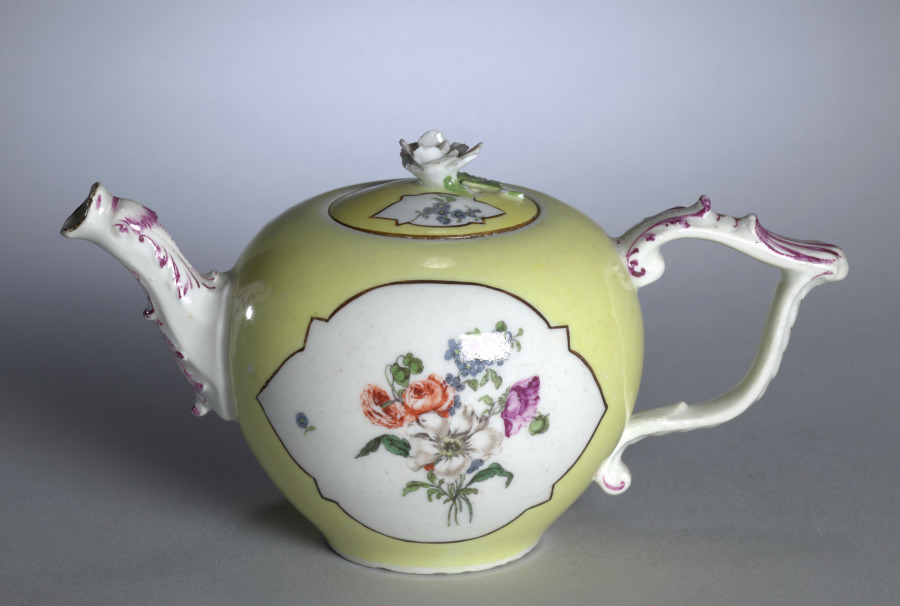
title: Teapot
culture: Germany, Meissen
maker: Meissen Porcelain Factory (German, est. c. 1710)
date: c. 1750–70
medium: porcelain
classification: Ceramic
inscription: Mark on the bottom that looks like two swords crossing, with a small V intersecting.